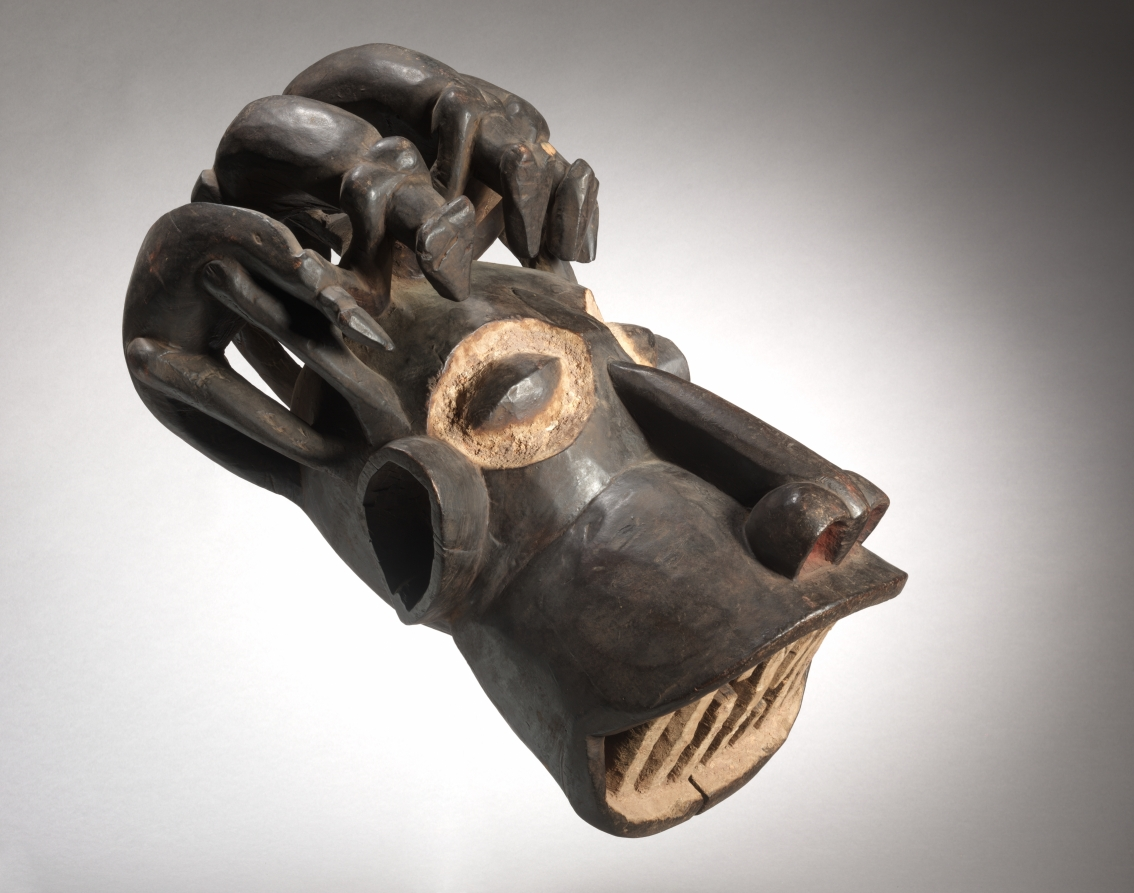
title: Helmet Mask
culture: Africa, Central Africa, Cameroon, possibly Kom-style maker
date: early 1900s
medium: Wood, paint, organic material, and iron alloy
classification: Mask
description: Deliberately distorted and exaggerated facial features reflect the awesome powers of a great chief. The quadrupeds on the mask’s head suggest the close association between the leopard and the king. In the Cameroon grasslands, masks are typically related to a regulatory society that guards ancestral mores; society members wear the masks and dance in the secrecy of the night.